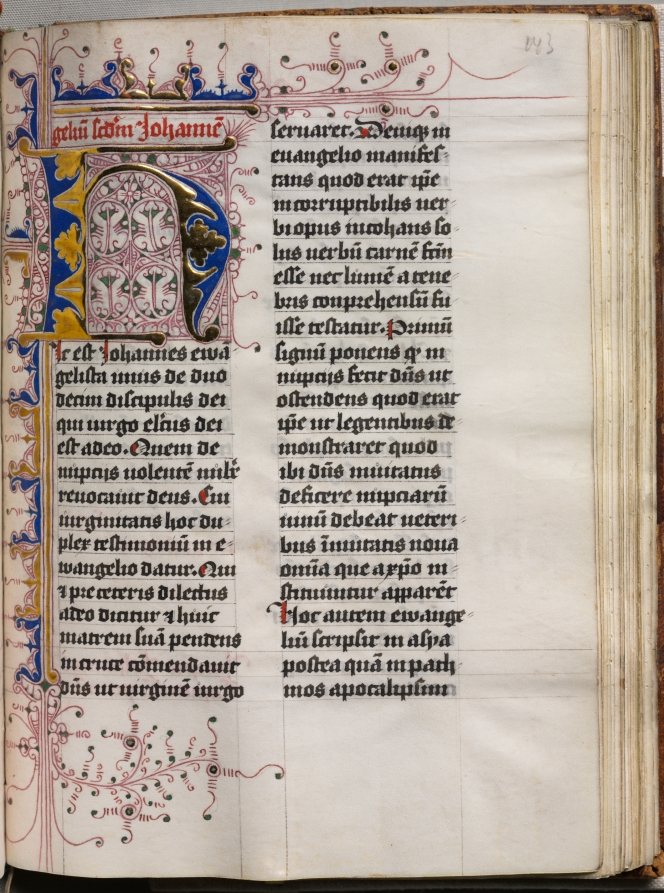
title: Gospel Book with Evangelist Portraits: Decorated Initial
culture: Germany, Middle Rhine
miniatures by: Master of the House-Book (German, c. 1470–1500)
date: c. 1480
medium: ink, tempera, and gold on vellum; original blind stamped leather binding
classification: Bound Volume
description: The four gospels are preceded by a full-page portrait miniature of the appropriate evangelist. Per tradition, they are represented as contemporary scribes surrounded by all the tools of their trade— ink pots, quill pens, and penknives. The anonymous illuminator of these miniatures, called the Hausbuch Master, is known primarily for an album of lively drawings as well as some 90 copper engravings now in Amsterdam. He was also apparently a panel painter of some distinction. The skillful pen work, tracery, and vine scrolls, as well as the large initials, are the work of other artists.The binding is original.